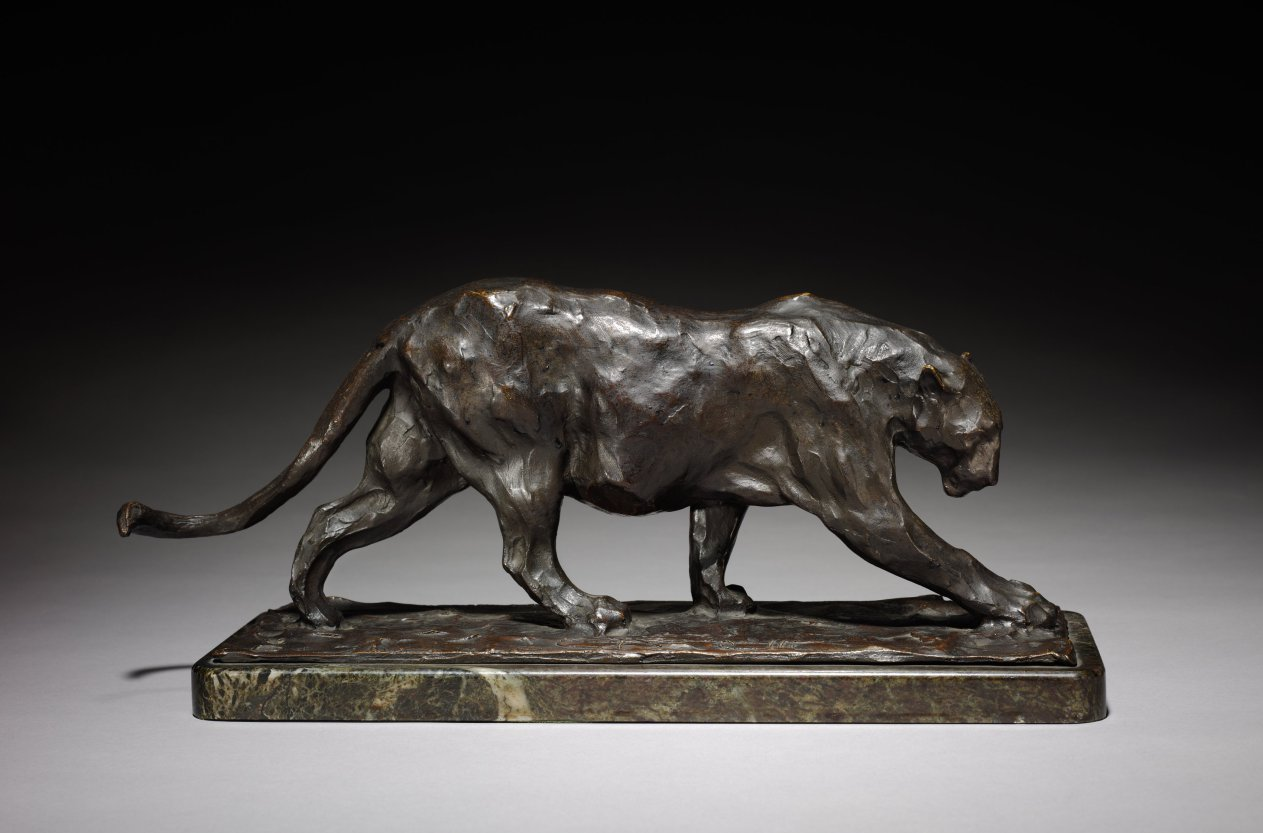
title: Walking Panther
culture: Italy, active in France, early 20th Century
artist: Rembrandt Bugatti (Italian, 1884–1916)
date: 1903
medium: bronze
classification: Sculpture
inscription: signed: R. Bugatti, stamped A. A. Hebrard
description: Panthers were among the first wild animals depicted by Rembrandt Bugatti after his encounter with them in the French national zoo, at the Jardin des Plantes in Paris.